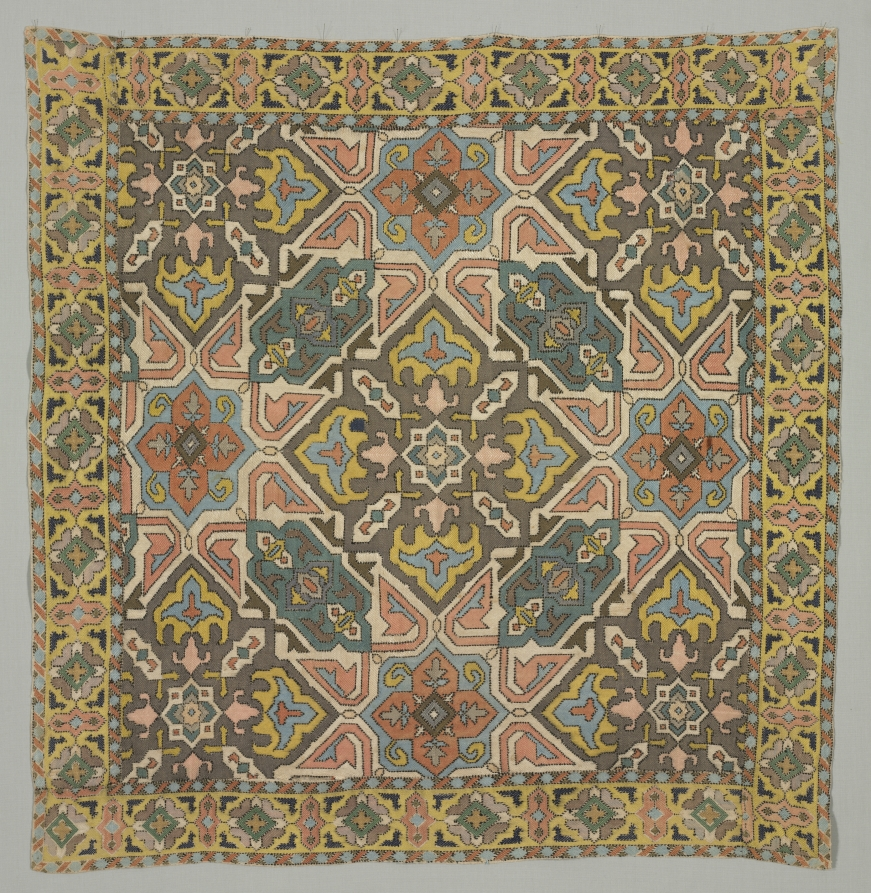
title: Cover with geometric design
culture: Iran, Qajar period (1779-1925)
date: 1800s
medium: plain weave: cotton; embroidery, surface darning and running stitch: silk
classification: Embroidery